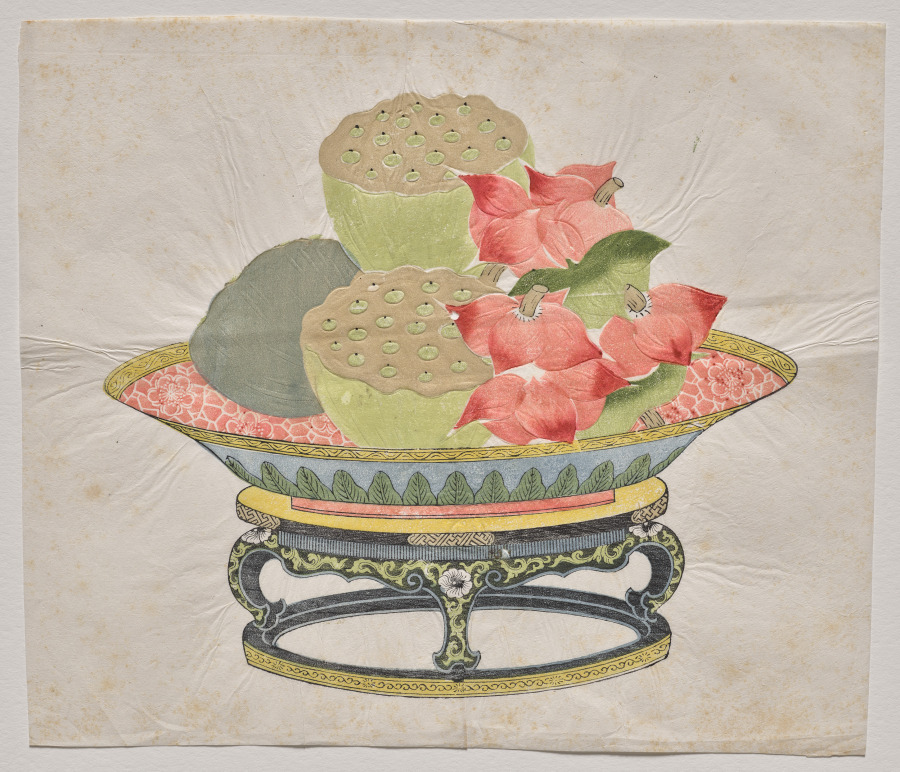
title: Lotus Seeds and Water Caltrops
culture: China, Suzhou, Qing dynasty (1644–1911)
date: 1700–1750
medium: Polychrome woodblock print; ink and color on paper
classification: Print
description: In the 1600s, printing flourished in such Jiangnan cities as Nanjing, Suzhou, Hangzhou, and Huizhou, evolving from privately enjoyed illustrated books printed in color to more commercialized single-sheet color prints that were hung on walls and became part of the rich urban visual culture.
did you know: Woodblock printing in color reached a height in China in the 1600s to 1700s. The prints were executed by means of sets of separate blocks, each carved to print a different color.